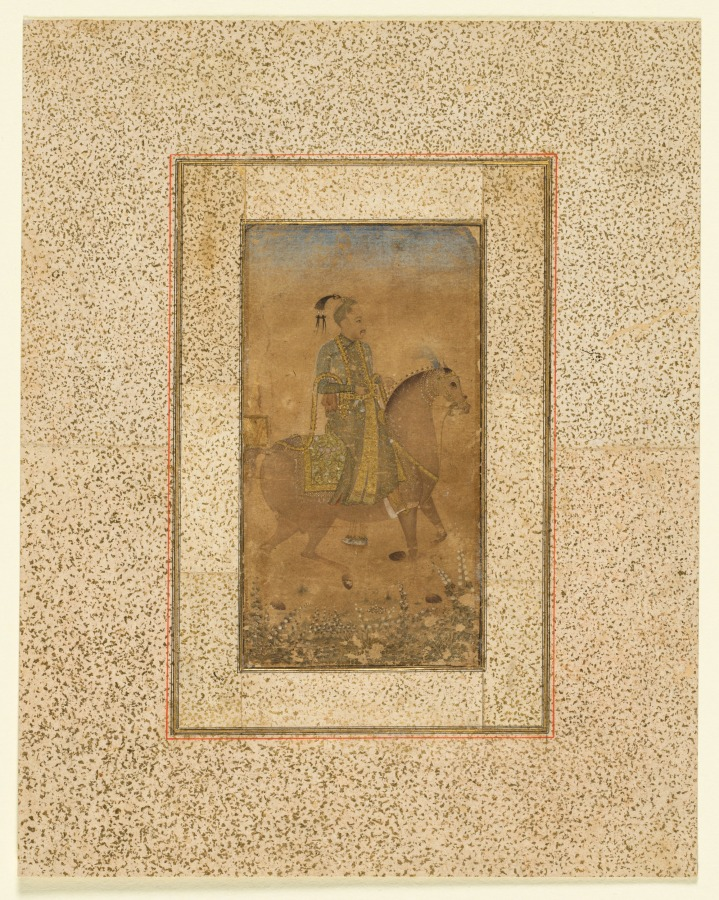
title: Sultan Abdullah Qutb Shah (1614-74) on Horseback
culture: Southern India, Golconda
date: c. 1635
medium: Ink, watercolor, and gold on paper, mounted with gold-sprinkled borders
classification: Painting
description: Sultan Abdullah Qutb Shah came to the throne of Golconda at the age of twelve and ruled until 1635 when the Mughal emperor Shah Jahan invaded the Deccan. Although Sultan Abdullah Qutb Shah kept his position, he did so under conditions named by Shah Jahan that included the payment of tribute money, conversion to Sunni Islam, and the presence of a Mughal political agent at the Golconda court. In this watercolor portrait, executed with subdued colors that complement the gold accents, the young Sultan wears a diaphanous shawl over his richly embroidered robe. His horse is almost as lavishly dressed in decorative trappings and jewels as his rider.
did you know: Specks of gold are sprinkled around the edges of this portrait.